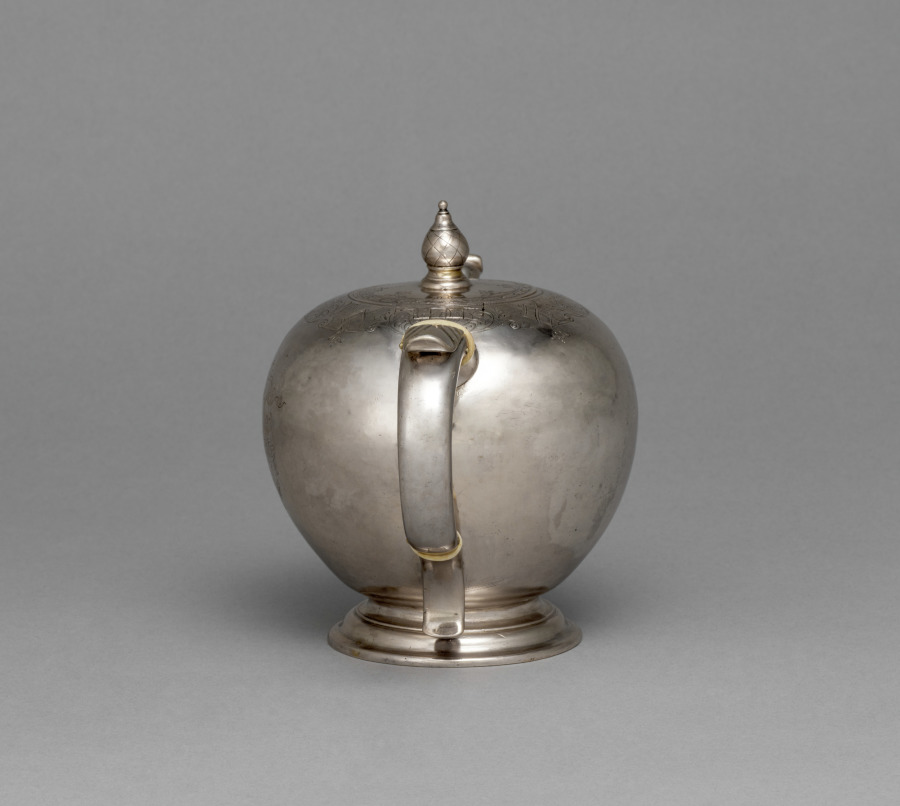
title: Teapot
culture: America, Massachusetts, Boston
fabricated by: Jacob Hurd (American, 1702–1758)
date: c. 1740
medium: silver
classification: Silver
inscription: engraved coat of arms of Whipple.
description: This teapot was made by Jacob Hurd, the father of Nathaniel Hurd whose portrait by John Singleton Copley is in gallery 204. The finial is probably not original to this teapot.